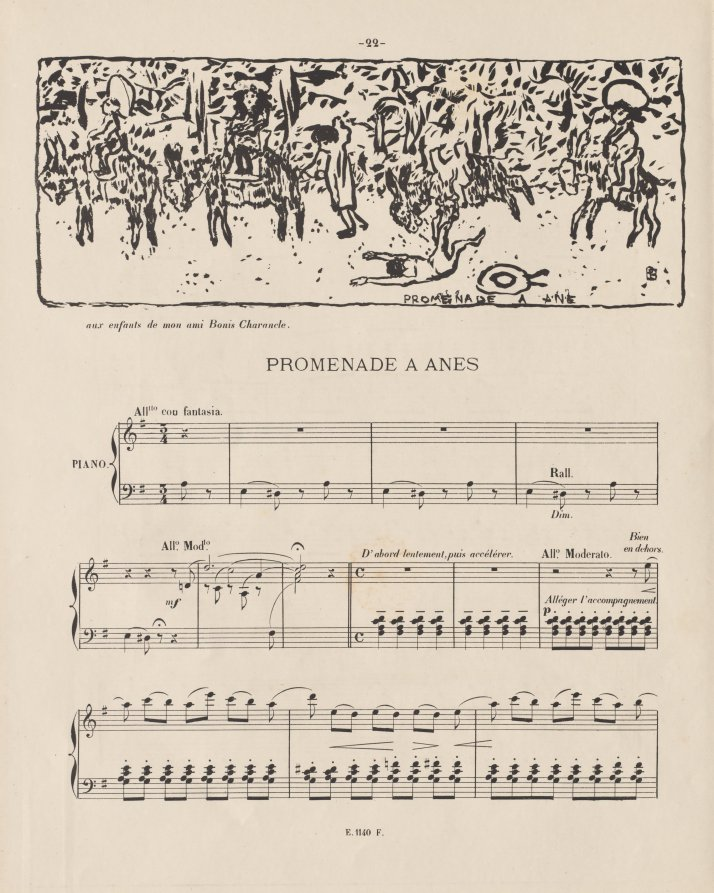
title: Donkey Ride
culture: France, 19th century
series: Petites scènes familières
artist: Pierre Bonnard (French, 1867–1947)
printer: Crevel Frères (French, 19th century)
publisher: E. Fremont (French, 19th century)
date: 1893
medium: lithograph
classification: Print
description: This print is among Pierre Bonnard's early experiments in lithography and his first attempt at illustration. Each image accompanies a musical composition by Claude Terrasse, the artist's brother-in-law. Bonnard used simple, sketchy lines to suggest the humor of the album's commentary on daily life in Paris.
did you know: Pierre Bonnard completed these illustrations while visiting his sister and brother-in-law in the coastal town of Arcachon.